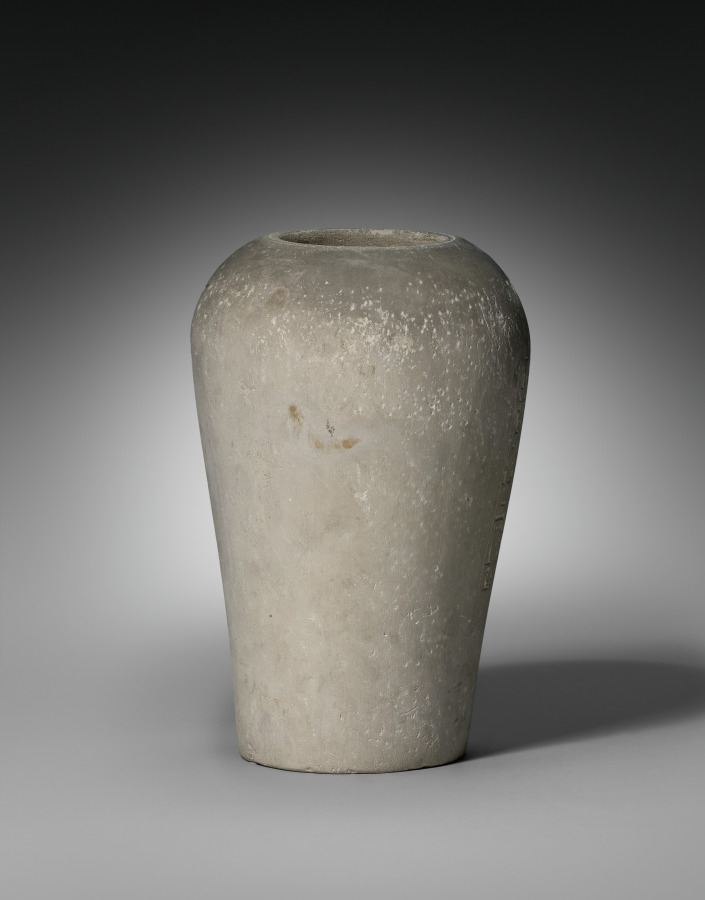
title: Canopic Jar with Lid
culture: Egypt, New Kingdom (1540–1069 BCE), Dynasty 18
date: 1540–1296 BCE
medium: limestone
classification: Funerary Equipment